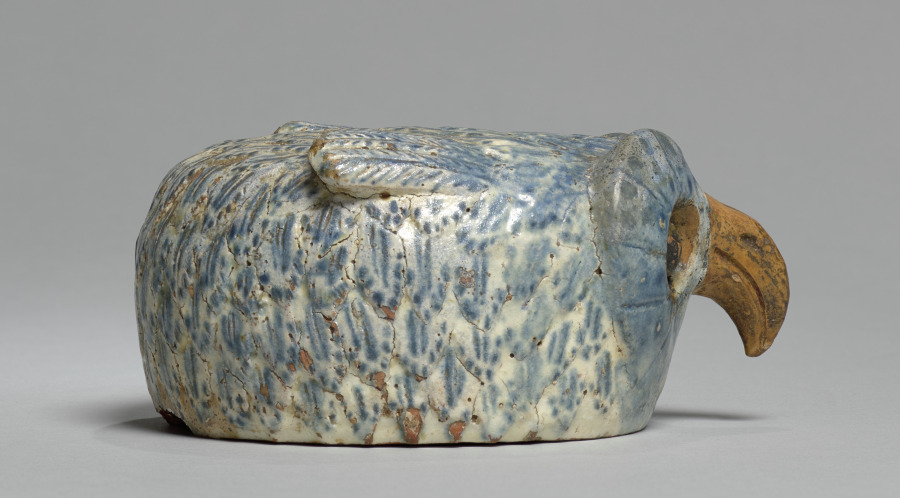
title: Owl (head)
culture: Southern Germany, 16th century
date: 1540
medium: faience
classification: Ceramic